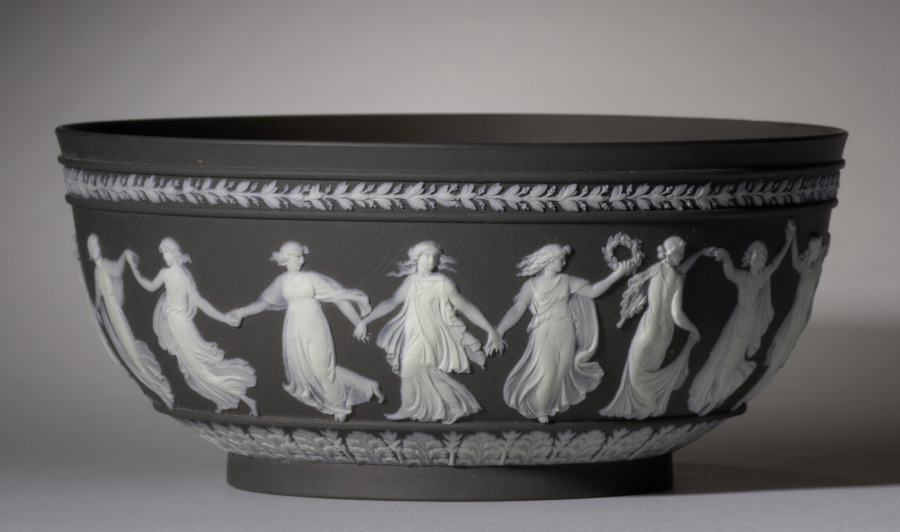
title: Bowl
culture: England, Staffordshire, 19th century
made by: Wedgwood Factory (British)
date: 1800–1850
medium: black basalt ware with applied decorations in white jasper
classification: Ceramic